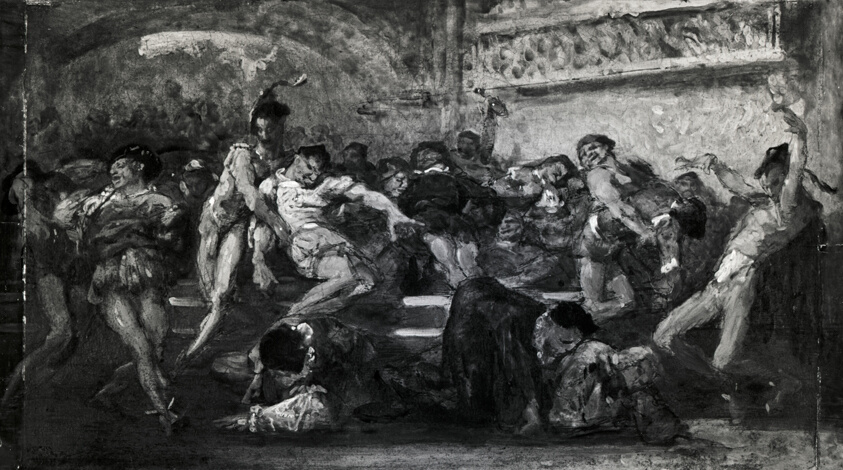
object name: Painting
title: The Carousal (Scene from Faust?)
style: 19th century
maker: Artist unknown (French, 19th century)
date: c. 1860/70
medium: Oil on panel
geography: France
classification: painting; france; french; oil on panel; paint; european painting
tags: literature, celebrations, taverns, women, men, people